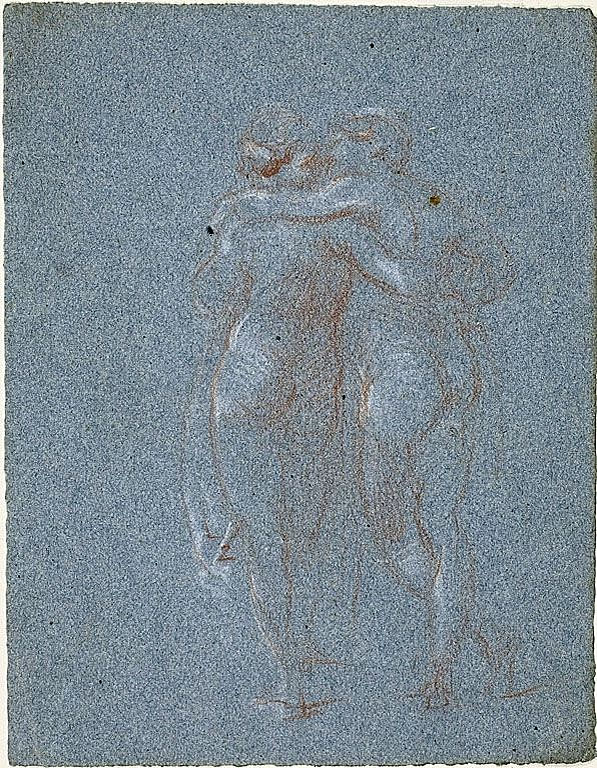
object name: Drawing and Watercolor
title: Two Standing Figures, Embracing (recto); Man with Scythe and Sketches of Buildings (verso)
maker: Jean Baptiste Carpeaux (French, 1827-1875)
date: 1847/75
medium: Red and white chalk (recto); and red chalk (verso), on blue wove paper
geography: France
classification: chalk; drawings (visual works); prints and drawing